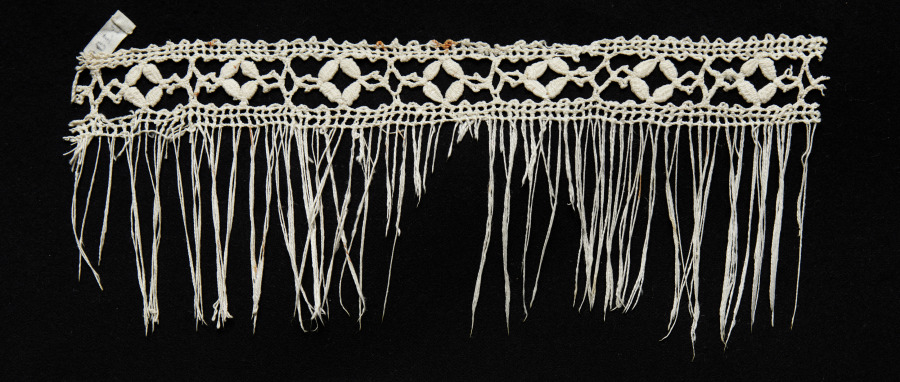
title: Lace Insertion with Fringe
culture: Italy, Genoa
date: 1550–99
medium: Bobbin lace (needle lace, reticella design)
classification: Lace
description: Although this fringed bobbin lace fragment is made of linen, its format is like those for laces made of gold, silver, and colored silk threads.